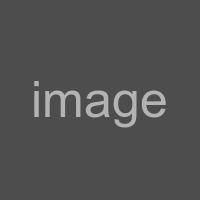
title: Veddahs of Ceylon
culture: India, 19th century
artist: Scowen & Co. (British, active Ceylon, 1876–1895)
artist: or Skeen & Co. (British, active 1860–1920)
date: c. 1880s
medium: albumen print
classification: Photograph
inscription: Written in pencil on verso: “Veddahs”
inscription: Unidentified watermark on the upper edge of the photograph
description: The Veddahs or Veddas are an indigenous minority in Ceylon (now Sri Lanka) that may have been the island’s earliest inhabitants. These men are dressed in typical scant Vedda male garb for the 19th century—loincloths tied with a rope at the waist.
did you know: The Veddahs were originally animists who believed that plants and inanimate objects had souls.